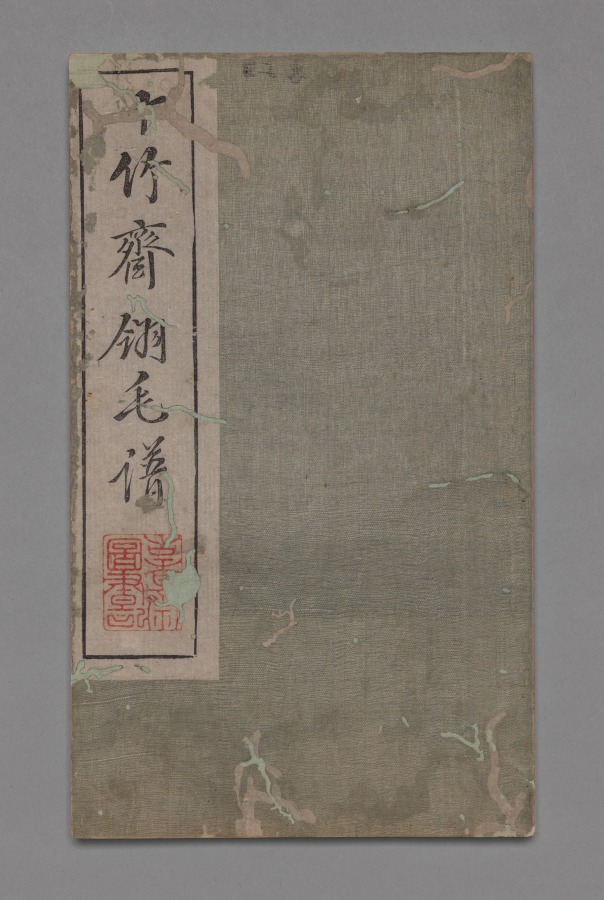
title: Ten Bamboo Studio Painting and Calligraphy Handbook (Shizhuzhai shuhua pu): Birds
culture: China, Qing dynasty (1644-1911)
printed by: Hu Zhengyan (Chinese, c. 1584–1674)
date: 1633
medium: Woodblock-printed book; ink and colors on paper; first edition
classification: Print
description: Color printing reached a level of perfection in the early 1600s, as seen in this Ten Bamboo Studio Collection of Calligraphy and Painting and the Mustard Seed Garden Manual of Painting (printed 1679 and 1701). The painterly quality, precision in registering (aligning) the woodblocks, and harmonious colors made them the most successful color print editions in Chinese history. Both editions were printed and compiled in Nanjing, spread nationwide, and had a great impact on the arts in Japan and Korea.